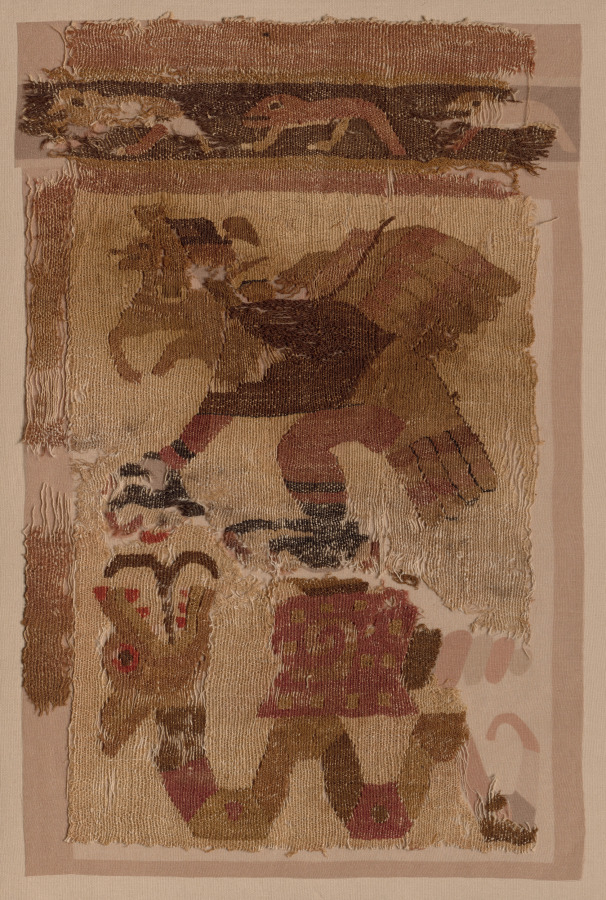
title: Textile Fragment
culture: Peru, Moche, north coast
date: c. 50–650 CE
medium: cotton and camelid fiber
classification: Textile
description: This fragment, one of several in the collection, is a rare survivor of catastrophic rains that destroyed much of the Moche textile legacy and may have helped to bring about the decline of Moche culture. It depicts a serpent and a snail beneath a hovering raptorial bird—perhaps a snail kite, a type of hawk named after its favored food. The size of the motifs implies that the original textile was large; a mantle (a shawl-like garment) or a hanging are among the possibilities.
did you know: This fragment is a rare survivor of floods that destroyed much of the Moche textile record.